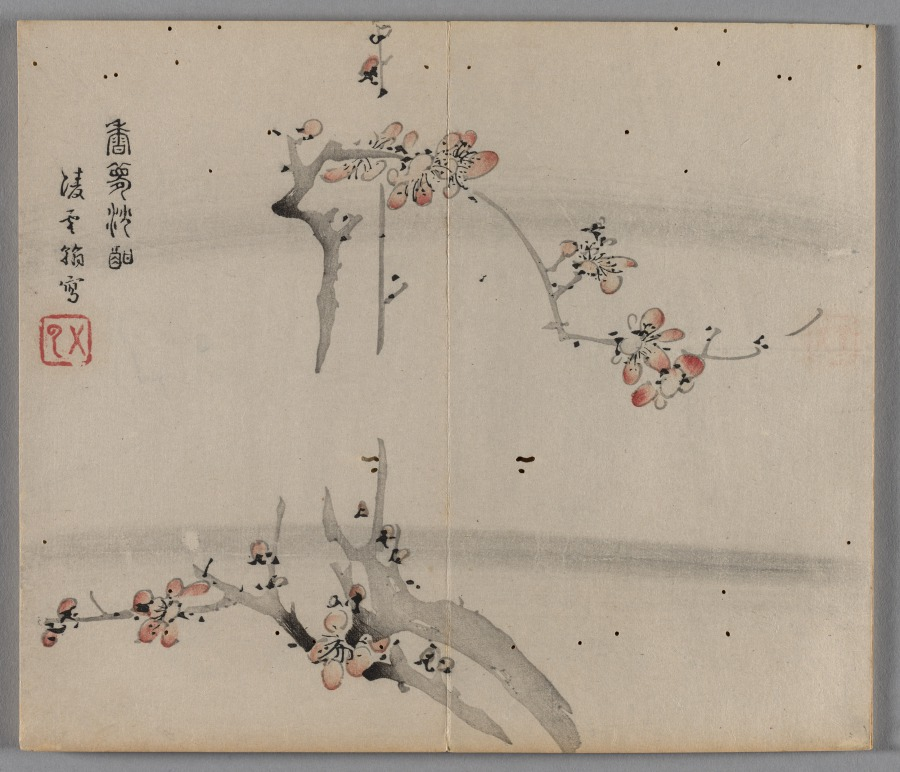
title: Ten Bamboo Studio Painting and Calligraphy Handbook (Shizhuzhai shuhua pu): Plum Blossoms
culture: China, Qing dynasty (1644-1911)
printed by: Hu Zhengyan (Chinese, c. 1584–1674)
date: 1633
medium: Woodblock-printed book; ink and colors on paper; first edition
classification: Print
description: Color printing reached a level of perfection in the early 1600s, as seen in this Ten Bamboo Studio Collection of Calligraphy and Painting and the Mustard Seed Garden Manual of Painting (printed 1679 and 1701). The painterly quality, precision in registering (aligning) the woodblocks, and harmonious colors made them the most successful color print editions in Chinese history. Both editions were printed and compiled in Nanjing, spread nationwide, and had a great impact on the arts in Japan and Korea.